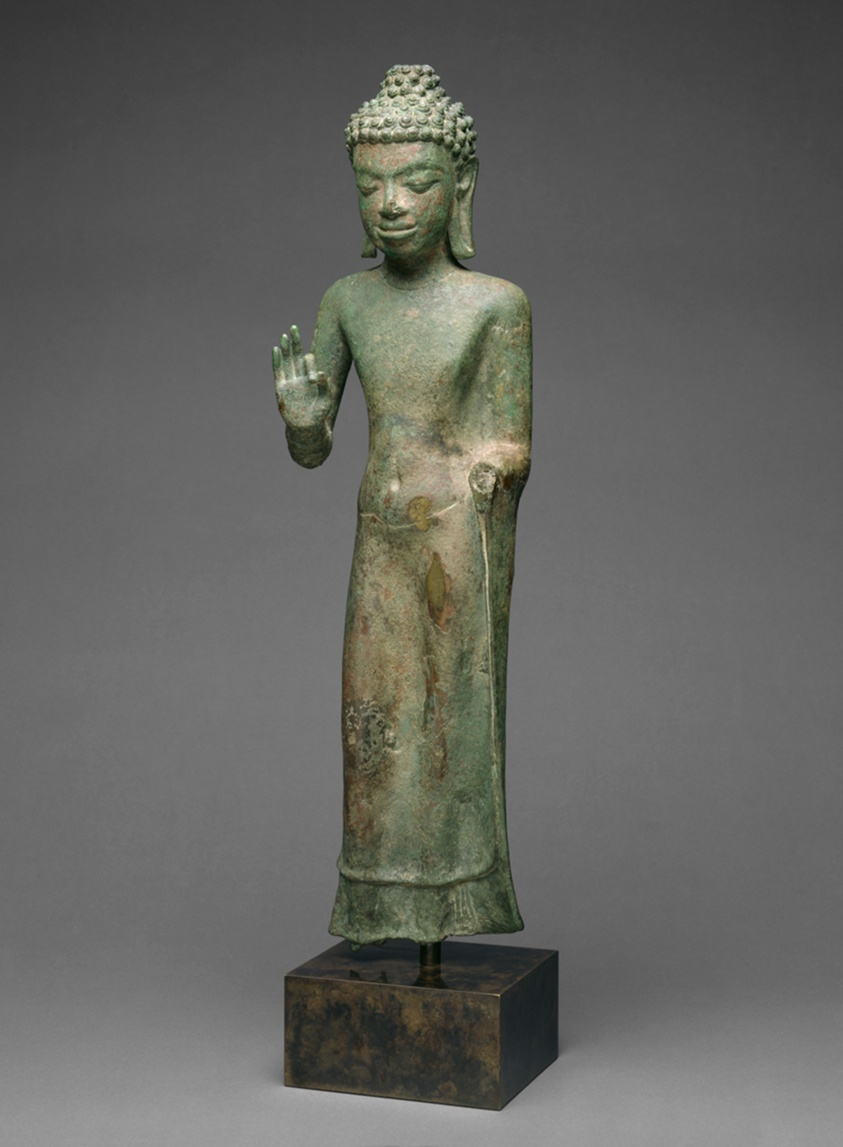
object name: Sculpture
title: Standing Buddha with Hand in Gesture of Teaching (<em>Vitarkamudra</em>)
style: Southeast Asian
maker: Thailand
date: Mon period, 8th century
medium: Bronze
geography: Thailand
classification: bronze; metal; sculpture; asian art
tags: Buddha